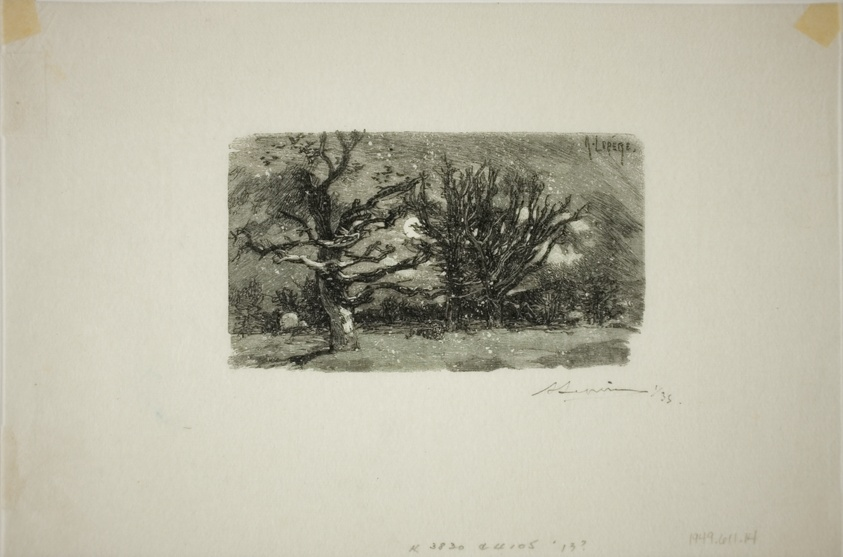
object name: Print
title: Au Dormoir de Lantara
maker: Louis Auguste Lepère (French, 1849-1918); published by A. Desmoulins (French, active c. 1908-1910)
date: published 1908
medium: Wood engraving in black on cream laid Japanese paper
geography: France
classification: wood engraving; print; prints and drawing